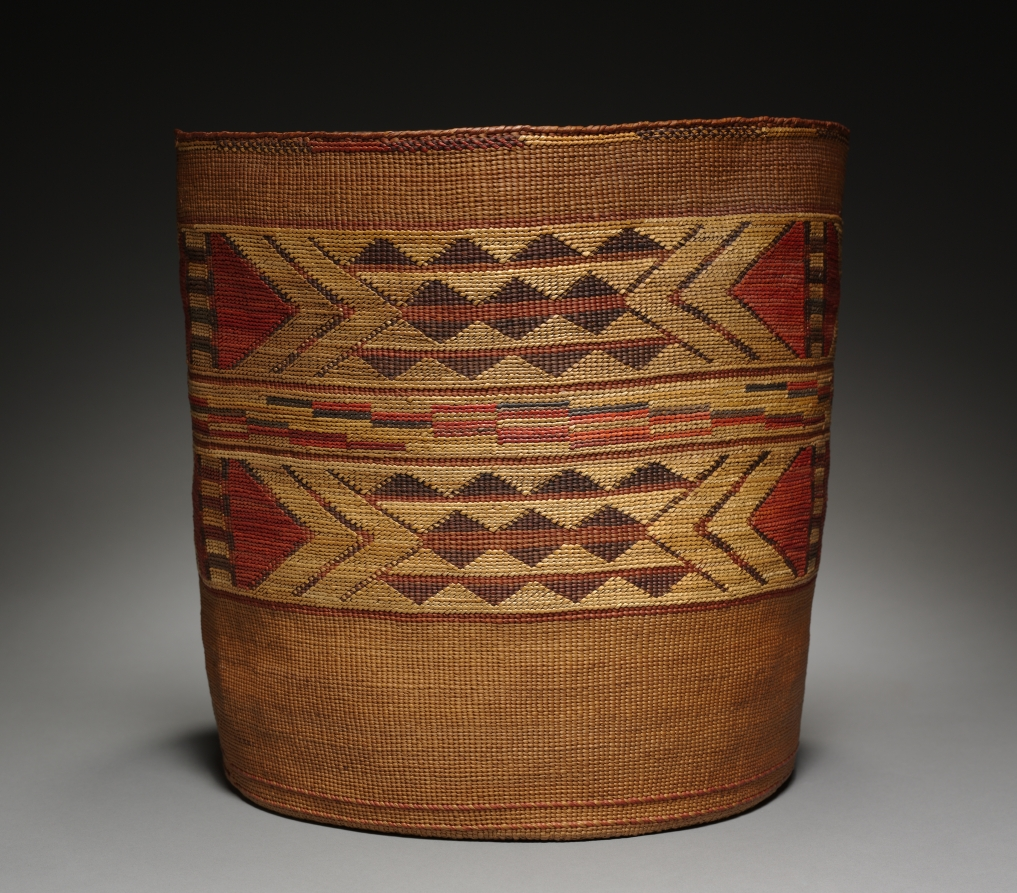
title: Cooking Basket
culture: Northwest Coast, Tlingit, late 19th Century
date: late 1800s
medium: Spruce root; twined, false embroidery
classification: Basketry